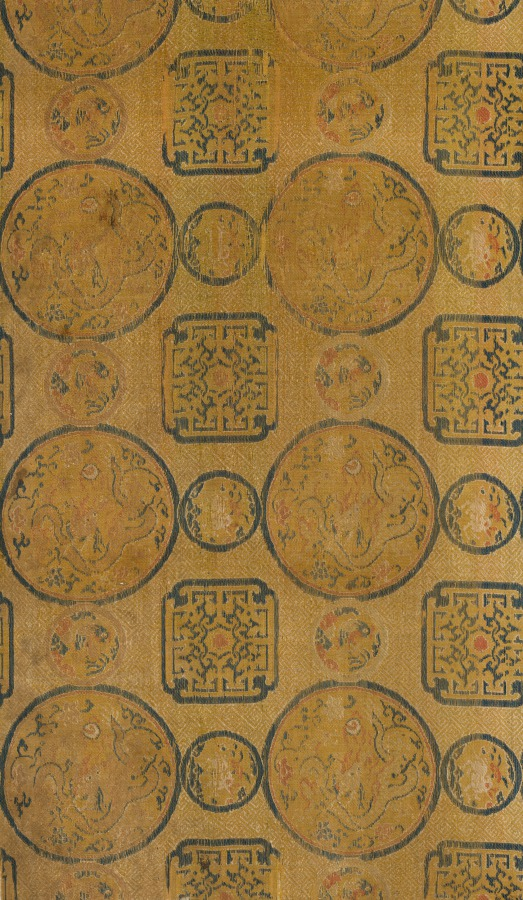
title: Fragment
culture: China, 18th century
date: 1700s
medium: silk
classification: Textile